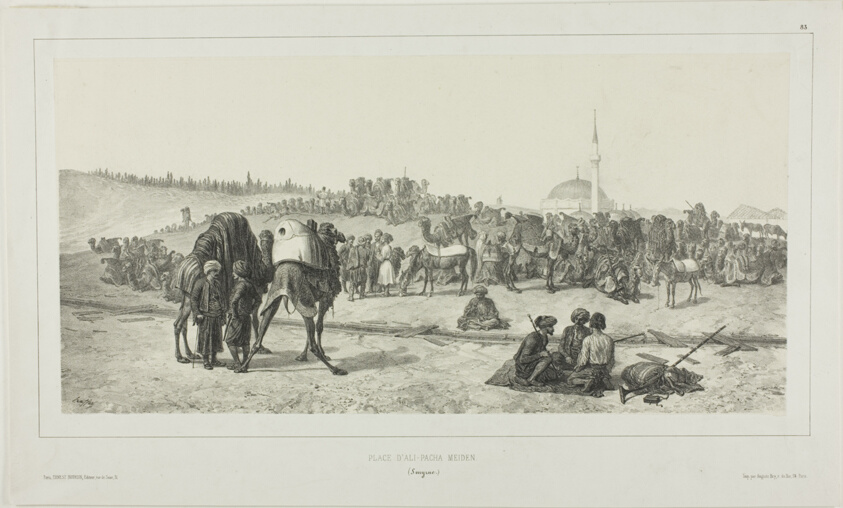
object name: Print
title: Ali-Pacha Meiden, Smyrna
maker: Denis Auguste Marie Raffet (French, 1804-1860); printed by Auguste Bry (French, 19th century); published by Éditeur Ernest Bourdin (French, active 19th century)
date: 1837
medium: Lithograph in black on cream chine laid down on ivory wove paper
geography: France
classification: lithograph; print; prints and drawing